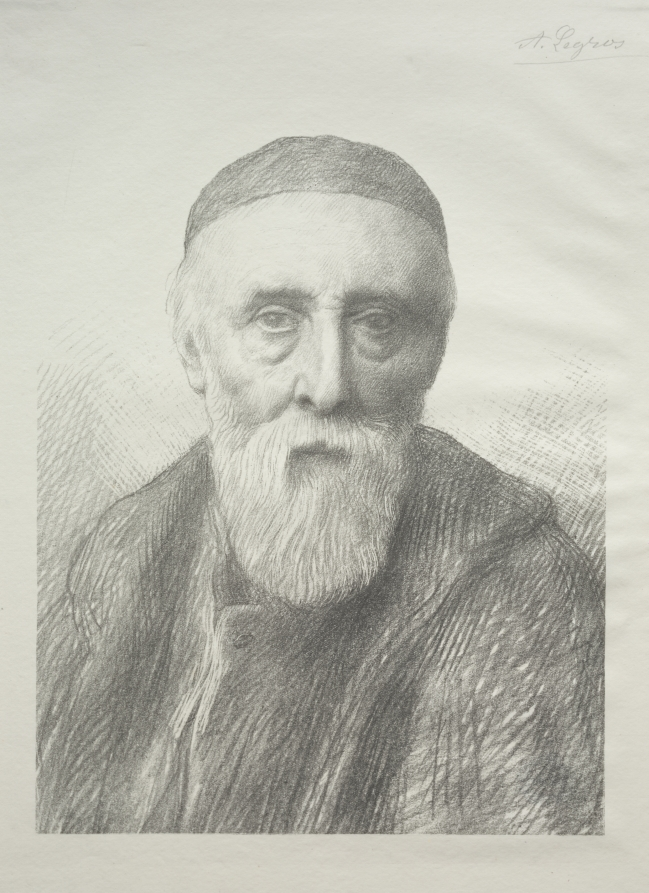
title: Portrait of George Frederic Watts (2nd Plate)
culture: France, 19th-20th century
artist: Alphonse Legros (French, 1837–1911)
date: c. 1857–1911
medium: lithograph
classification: Print